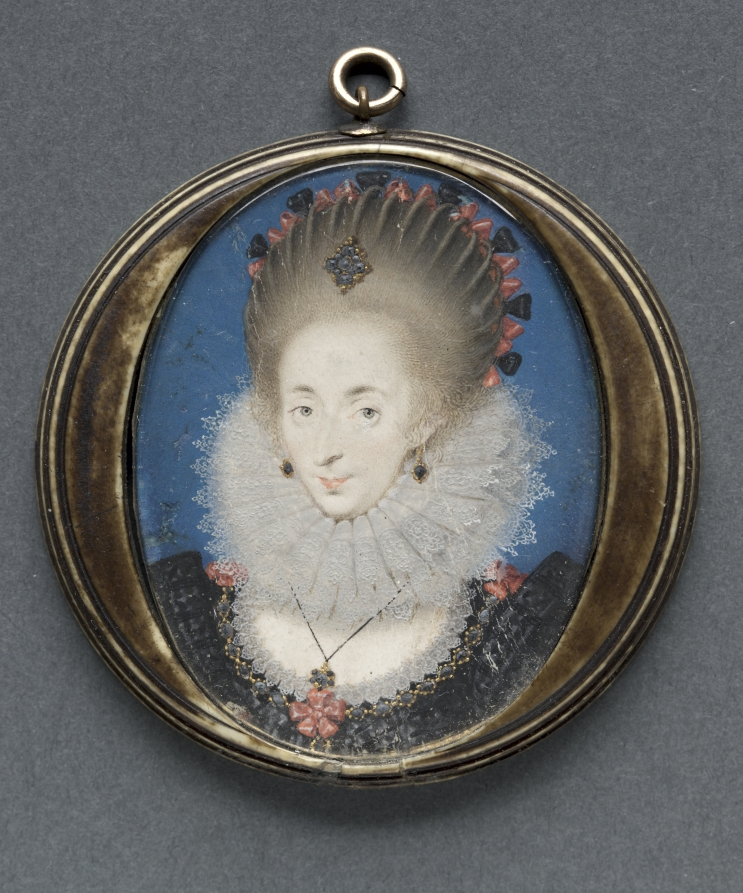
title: Portrait of Lucy Russell, Countess of Bedford, née Harrington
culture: England, 17th century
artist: studio of Isaac Oliver (French, c. 1565–1617)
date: 1612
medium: watercolor on vellum with gold and silver in original stained ivory case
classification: Portrait Miniature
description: Although the identity of the lady is uncertain, she must have been a wealthy woman, judging by her heavy and elaborate jewelry, complete with necklace, chain, earrings, jewel-encrusted dress and a kind of aigrette in her hair. In an age when clothes were assumed to be an accurate indicator of status, it was judged essential to wear your wealth, especially when immortalized in a portrait. Oliver painted the woman's pearl earrings using Nicholas Hilliard's jewelling technique, which involved laying a raised blob of white lead paint with some shadowing to one side. This form was then crowned with a rounded touch of real silver that was burnished with, to quote Hilliard, "a pretty little tooth of some ferret or stoat or other wild little beast." This technique brought the silver to a sparkling highlight, while actual gold is used to paint the pearl's gold setting. Silver tarnishes with age, therefore, the pearl earrings now appear black.